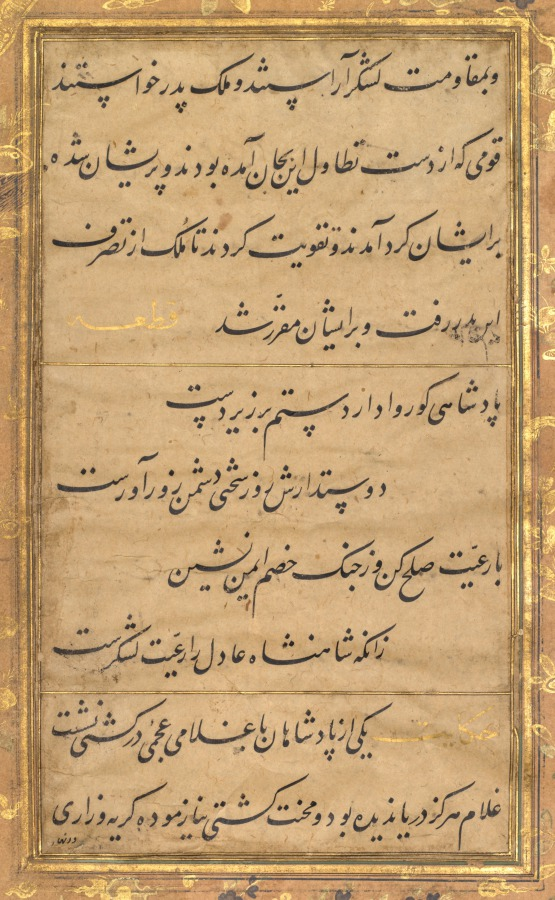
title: Illuminated folio from a Gulistan (Rose Garden) of Sa'di (c. 1213–1291)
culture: Iran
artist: Sultan 'Ali al-Mashadi (Iranian, 1430–1520)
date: about 1475–1500; border: about 1550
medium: Gum tempera, ink, gold, and silver on paper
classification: Manuscript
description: In the border surrounding the Persian poetical text, deer and a lion coexist peacefully in a forest. This imagery may reference the rule of a righteous king. The text is from the Gulistan, one of the most celebrated works of Persian literature, completed around 1258. Gulistan means “Rose Garden” in Persian; just as a rose garden is a collection of flowers, the contents are a collection of anecdotes. This page is from the section “On the Conduct of Kings.”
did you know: The silver blooms and streams of water have tarnished and darkened over time.